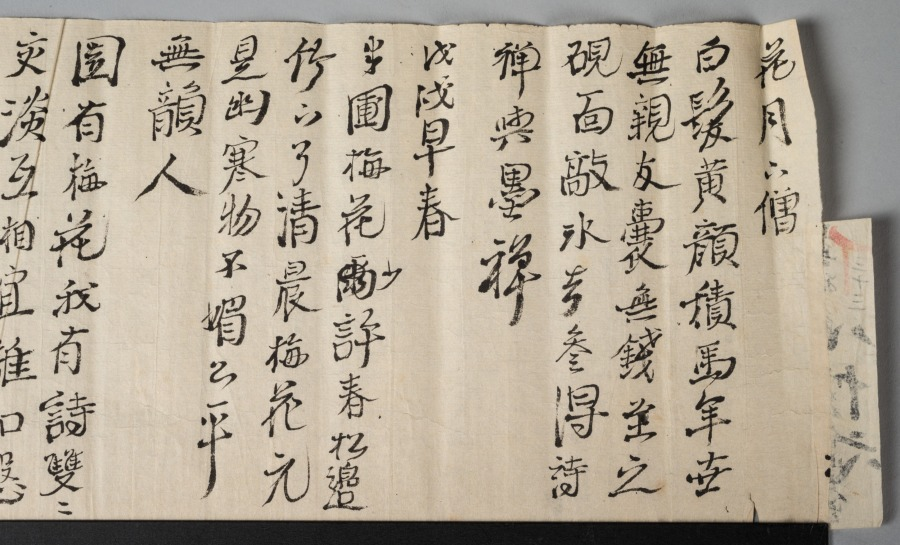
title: Happy Forest, from Water Margin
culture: Japan, Edo period (1615–1868)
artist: Matsumura Goshun (Japanese, 1752–1811)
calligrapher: and Amenomori Shōteki (Japanese, 1731–1786)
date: late 1700s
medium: hanging scroll; ink and color on paper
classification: Painting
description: The Chinese literary classic Water Margin is set in the 1120s and tells the story of 108 outlaws who first rebel against the government and then join forces with it. This painting depicts an episode in which hero Wu Song reclaims the tavern Happy Forest for its rightful owner, the prison warden’s son, Shi En. To prepare for the fight, Wu Song drinks a lot of wine. The painting was inscribed with a quote in which an ally describes Wu Song’s fighting style. It reads as follows: Where his twin fists rise, clouds and thunder roar, When his flying kick comes, wind and rain tremble.